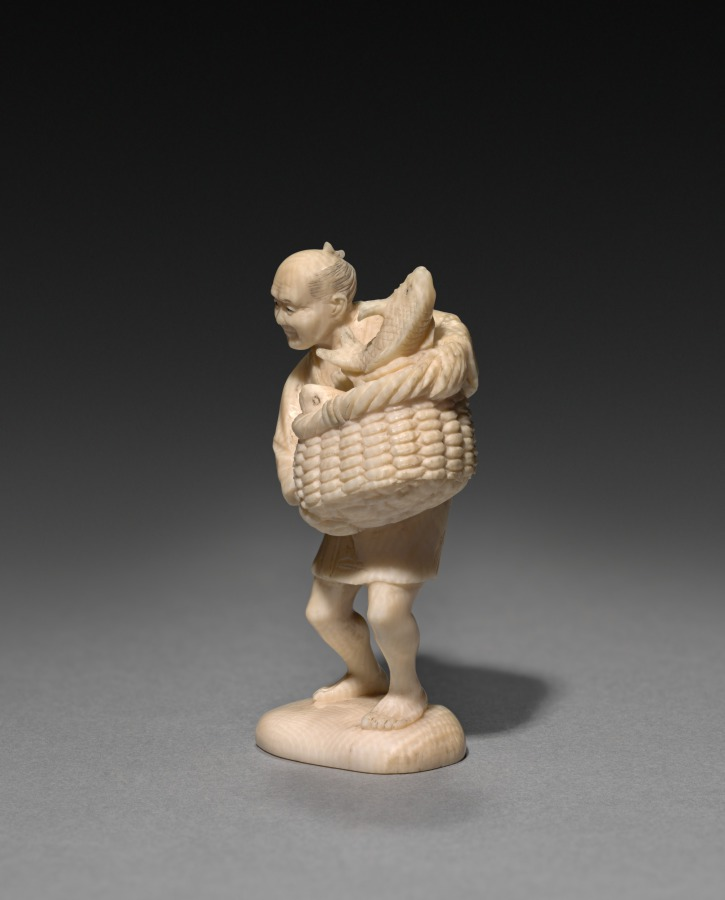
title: Man Carrying a Basket of Fish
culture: Japan, Meiji period (1868–1912)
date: early 1900s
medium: ivory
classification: Ivory